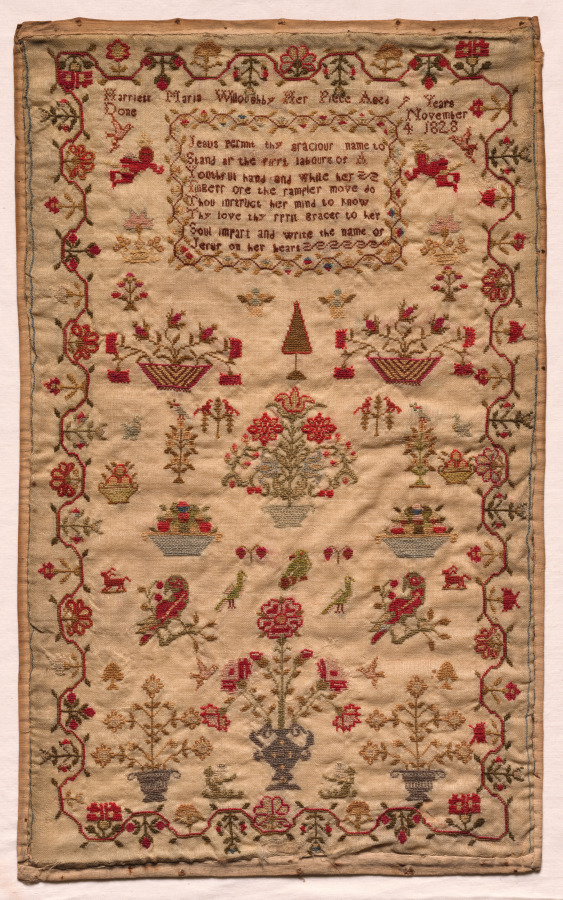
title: Sampler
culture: England, early 19th century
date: 1828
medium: embroidery on wool ground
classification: Sampler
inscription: above: "Harriett Maria Willoughby Her Piece Aged 9 Years/ Done November/ 4 1828"; framed verse below: "Jesus Permit thy gracious name to/ Stand as the first labours of A/ Youthful hand and While her/ Fingers ore the sampler move do/ Thou instruct her mind to know/ Thy love thy spirit's Graces to her/ Soul impart and write the name of/ Jesus on her heart."